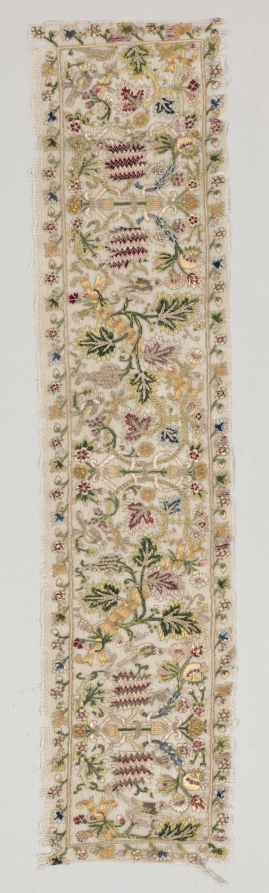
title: Altar Frontal (?)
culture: Italy, 17th century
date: 1600s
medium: embroidery; silk on linen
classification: Embroidery